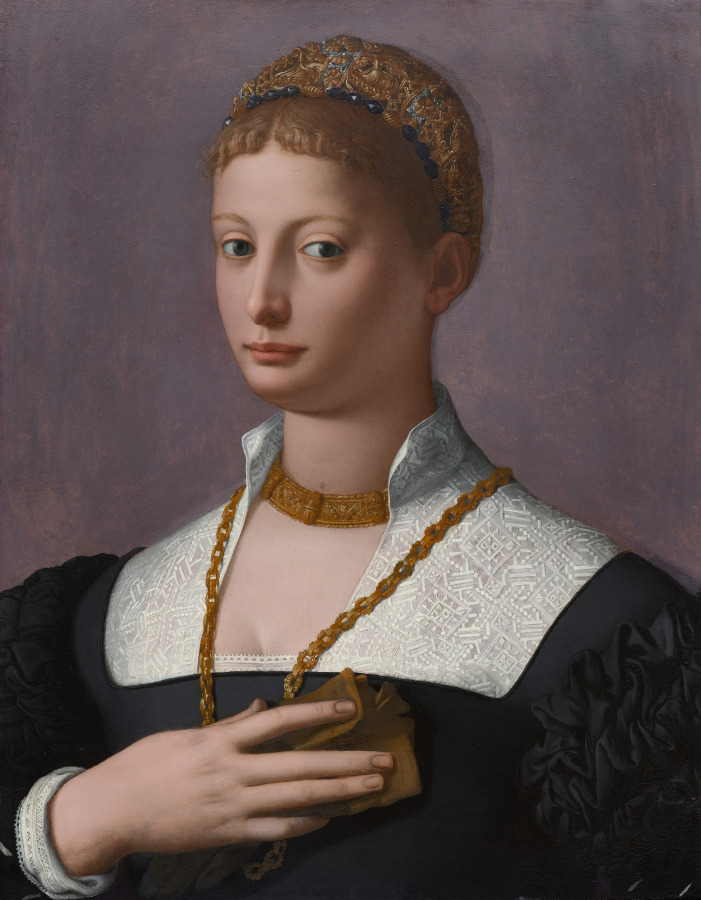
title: Portrait of a Woman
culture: Italy, Florence, 16th century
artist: Agnolo Bronzino (Italian, 1503–1572)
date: c. 1550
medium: oil on wood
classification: Painting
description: Bronzino was court painter to Cosimo I de’Medici, the Duke of Florence. Though the woman cannot be definitively identified, she was likely affiliated with the Medici court. As in most of the portraits in this gallery, Bronzino emphasizes wealth, status, and courtly refinement above personality or individualized expression. The plain background further accentuates the work’s monumentality and grandeur, despite its small scale. The hand placed against the chest with elegantly spread fingers extends back to an ancient Greek pose of modesty, here emphasizing the proper comportment of a woman of high status. The sitter wears a linen partlet (collar) delicately embroidered in matt stitch, part of which is, like her cuffs, trimmed in fine lace.